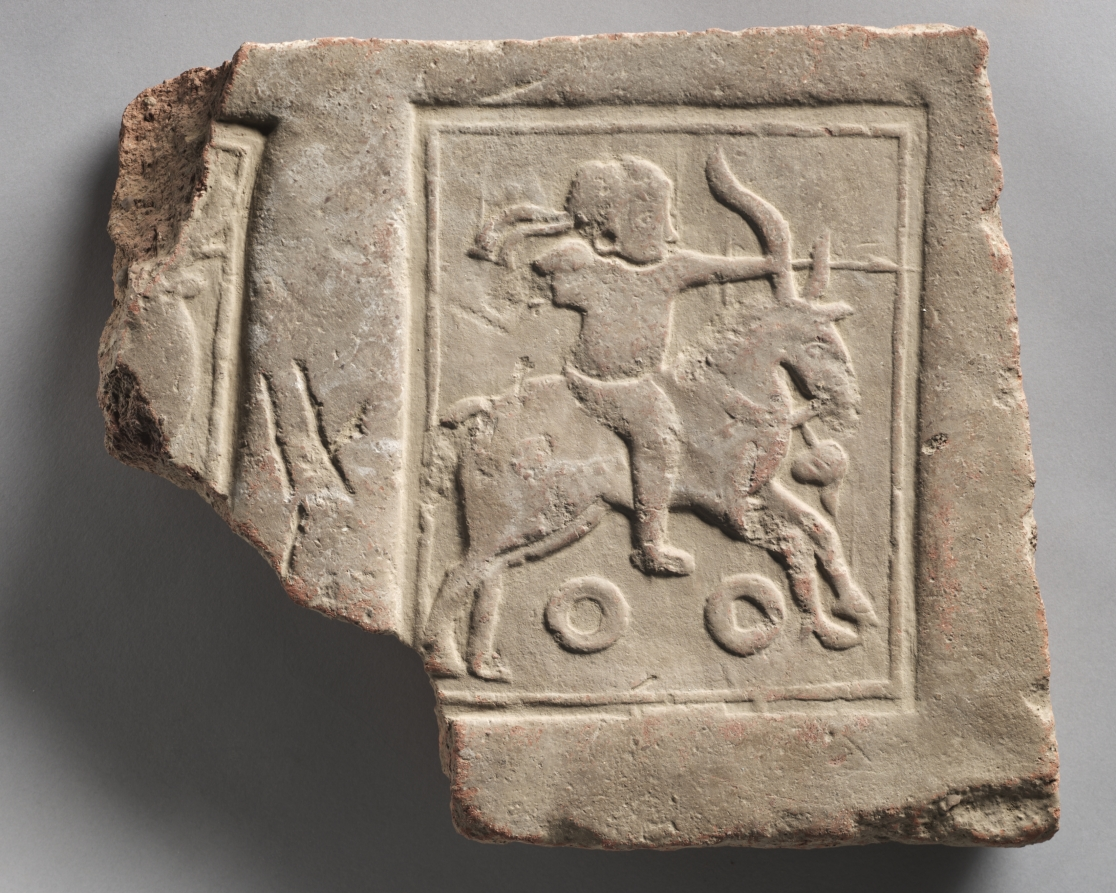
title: Archer on Horse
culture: India, Kashmir, Harwan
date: 300s CE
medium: terracotta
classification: Sculpture